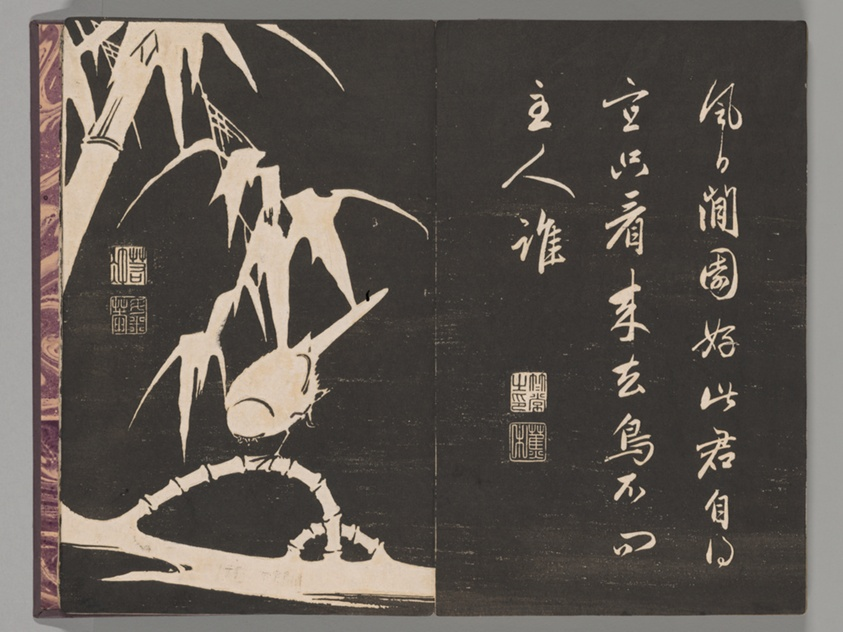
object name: Book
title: Soken sekisatsu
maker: Ito Jakuchu (Japanese, 1716-1800)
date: 1767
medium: Woodblock printed book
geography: Japan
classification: book